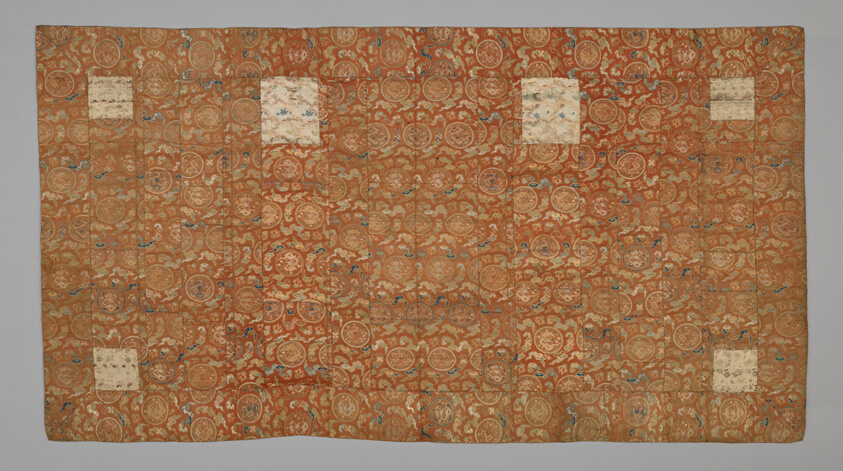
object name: Textile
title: Kesa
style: edo (japanese period)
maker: Japan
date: Edo period (1615–1868), late 18th century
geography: Japan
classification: textile; costume; liturgical - buddhist; weaving